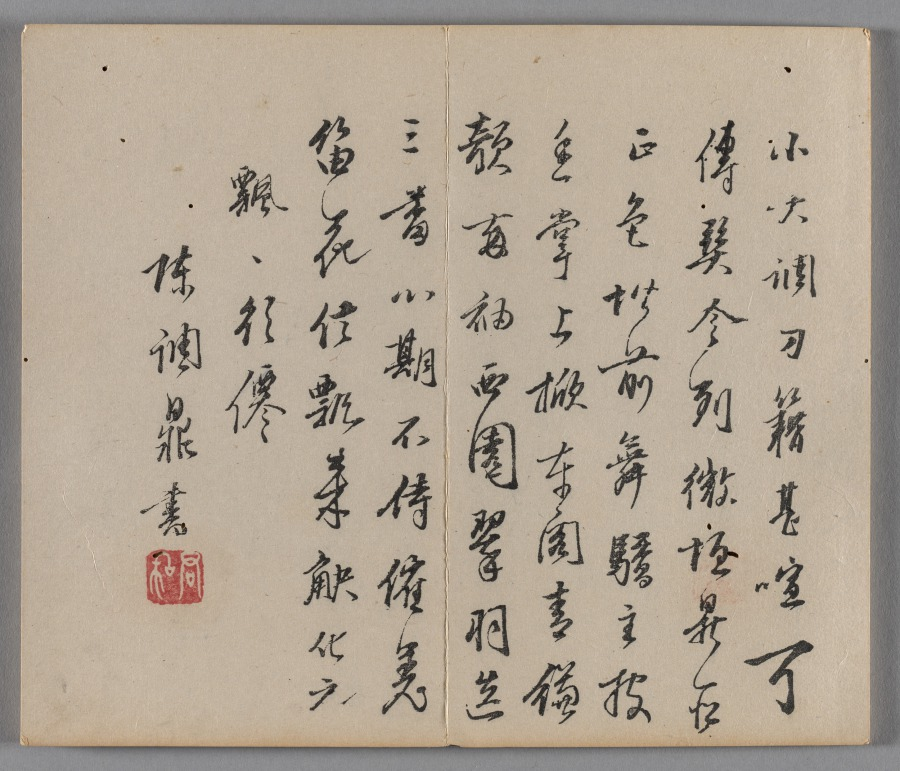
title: Ten Bamboo Studio Painting and Calligraphy Handbook (Shizhuzhai shuhua pu): Plum Blossoms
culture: China, Qing dynasty (1644-1911)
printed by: Hu Zhengyan (Chinese, c. 1584–1674)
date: 1633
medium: Woodblock-printed book; ink and colors on paper; first edition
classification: Print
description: Color printing reached a level of perfection in the early 1600s, as seen in this Ten Bamboo Studio Collection of Calligraphy and Painting and the Mustard Seed Garden Manual of Painting (printed 1679 and 1701). The painterly quality, precision in registering (aligning) the woodblocks, and harmonious colors made them the most successful color print editions in Chinese history. Both editions were printed and compiled in Nanjing, spread nationwide, and had a great impact on the arts in Japan and Korea.